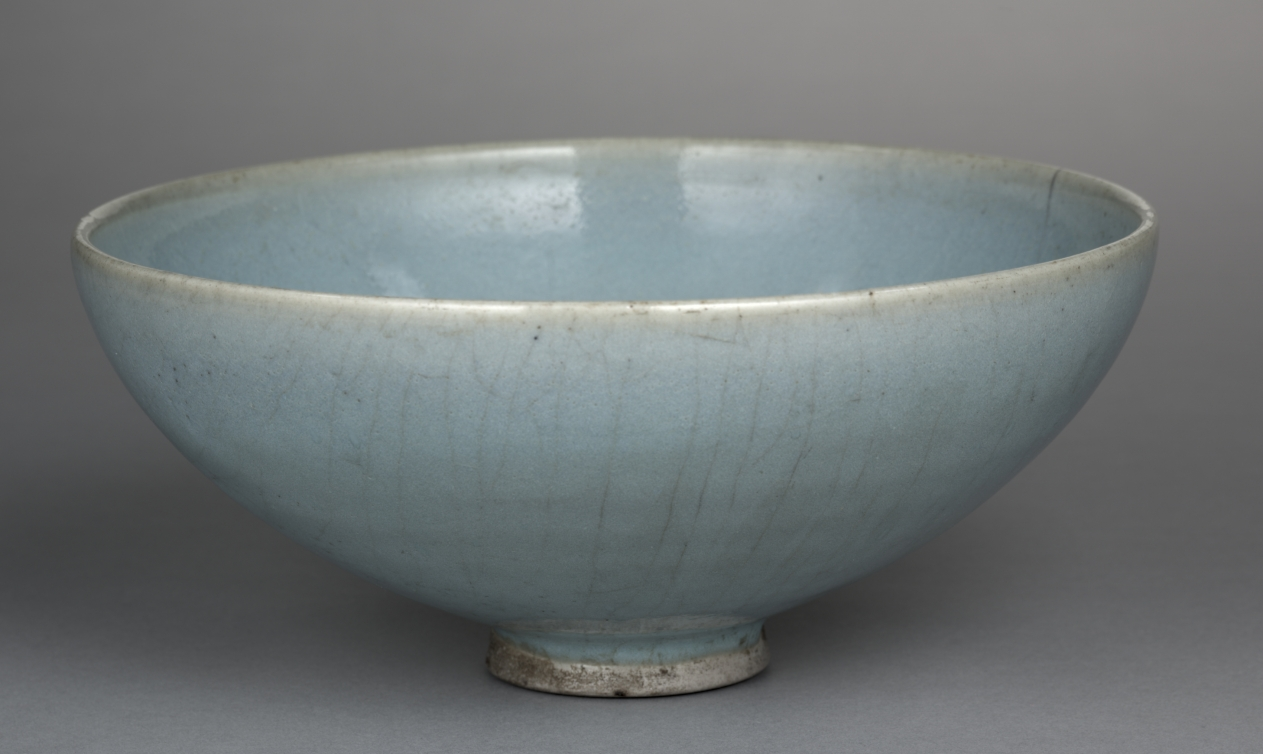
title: Bowl: Jun Ware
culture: Northern China, Northern Song dynasty (960-1127) - Jin dynasty (1115-1234)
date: 1100s-1200s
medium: glazed stoneware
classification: Ceramic